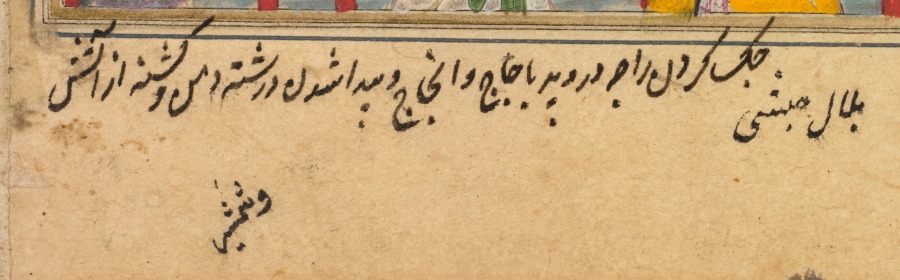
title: Yaja and Upayaja perform a sacrifice for the emergence of Dhrishtadyumna from the fire, from Adi-parva (volume one) of the Razm-nama (Book of Wars) adapted and translated into Persian by Mir Ghiyath al-Din Ali Qazvini, known as Naqib Khan (Persian, d. 1614) from the Sanskrit Mahabharata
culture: Mughal India; made for Abd al-Rahim the Khan Khanan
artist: attributed to Bilal Habshi (probably Ethiopian, active late 1500s)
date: 1598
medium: Gum tempera, ink, and gold on paper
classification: Painting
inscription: Inscriptions around painting: Ascribed to Bilal Habashi (probably Ethiopian, active late 1500s) Mughal court, made for Abd al-Rahim the Khan Khanan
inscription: Persian inscription in bottom margin, in nasta‘liq script: The performing of a sacrifice by King Drupada with Yaja and Upayaja and the appearing of Dhrishtadyumna and Draupadi from the fire; Bilal-i Habashi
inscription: Persian inscription at edge of bottom margin, in nasta‘liq script: and sword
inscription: Calligraphy: Persian text in naskh script: “. . . and rules in Panchala. I want you to take him and bring him to me.” They went to war with Drupada and fought a battle, and King Drupada managed to overcome the Kauravas and put them to flight, but the Pandavas fought him and brought him to Master Drona. Droṇa took half of his [Drupada’s] kingdom from him and left him the other half. King Drupada was extremely distressed that Master Drona had overcome him and wished he could have an offspring who would kill Master Drona. With this desire in his mind, he went to the shores of the Ganges River so that perchance he could find a person whose prayers on his behalf to the almighty God to graciously bestow upon him an offspring capable of killing Droṇa would be accepted. By the banks of the Ganges he saw two pious worshipers. One was called Yaja and the other Upayaja. He spent some time there performing services for them and bringing them whatever they required. After a long while, one day he said to Upayaja: “I would like you to do what is needed so that I have a son who could kill Master Drona. If you do this I will give you one lakh [a hundred thousand] of cows and whatever else you demand.” Upayaja did not accept this. Once again Drupada spent time at their service, and then once again he begged Upayaja to do this. He said: “Go to my elder brother Yaja, since he still has a little attachment to this world, so that he can perform the sacrifice for you, so that the almighty God would bestow on you the offspring that you desire.” King Drupada went therefore to Yaja the brahmin and told him what Upayaja had told him and said: “If you perform the sacrifice for me so that I have son who would kill Master Drona, I would give you eighty thousand cows.” Yaja said, “What kind of a person is Master Drona that you do not deem yourself a match for him?” Drupada said, “Droṇa is the kind of person who remains without rival and peer in the arts of war. His bow is six times the length of the elbow to the fingertip, and nothing in the world can rival and overcome him.” Yaja said: “I will perform the sacrifice for you, so long as my brother Upayaja joins forces with me.” So King Drupada and Yaja both went to Upayaja and pleaded so long that he at last agreed to be present at the sacrifice. They thus made a wish for King Drupada to have a son to kill Droṇa and made a big sacrifice, and from the midst of the sacrificial fire suddenly a son emerged clad in a coat of mail holding a bow in one hand.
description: Fire sacrifice was central to the Indo-European people who entered the Indian subcontinent as early as 1800 BC. Only Brahmins, a social class of priests, had access to the sacred texts called the Vedas, which explained the meaning and process of the fire sacrifice, considered by orthodox Hindus as a way to communicate with the gods. A king named Drupada in ancient India sponsored this fire sacrifice in order to generate a powerful warrior who would be able to slay the enemy who took half his kingdom. Seated around an altar in the sacrificial enclosure, Brahmins pour oblations into the fire and recite the prayers necessary to generate the divine warrior Dhrishtadyumna, shown here in full battle armor at birth. The inscription below gives the title and the name of the artist, Habshi, which means “Ethiopian,” suggesting the presence of Africans in the royal Mughal workshop. The story of how the warrior Dhrishtadyumna was generated from the fire sacrifice is written on this page. When King Drupada lost half his kingdom to a military master named Drona, he needed a gift from the gods to defeat him: a new warrior born to accomplish this mission. In order to obtain this gift, King Drupada went to the banks of the Ganges to find two powerful Brahmins to whom the gods would respond favorably. After serving them faithfully and offering payment of 100,000 cows, the Brahmins Yaja and Upayaja agreed to perform the sacrifice. The text is written in a form of Arabic script, called naskh, in the Persian language, as translated from the original Sanskrit epic Mahabharata for emperor Akbar (r. 1556¬–1605). The passages of dialogue are written diagonally.